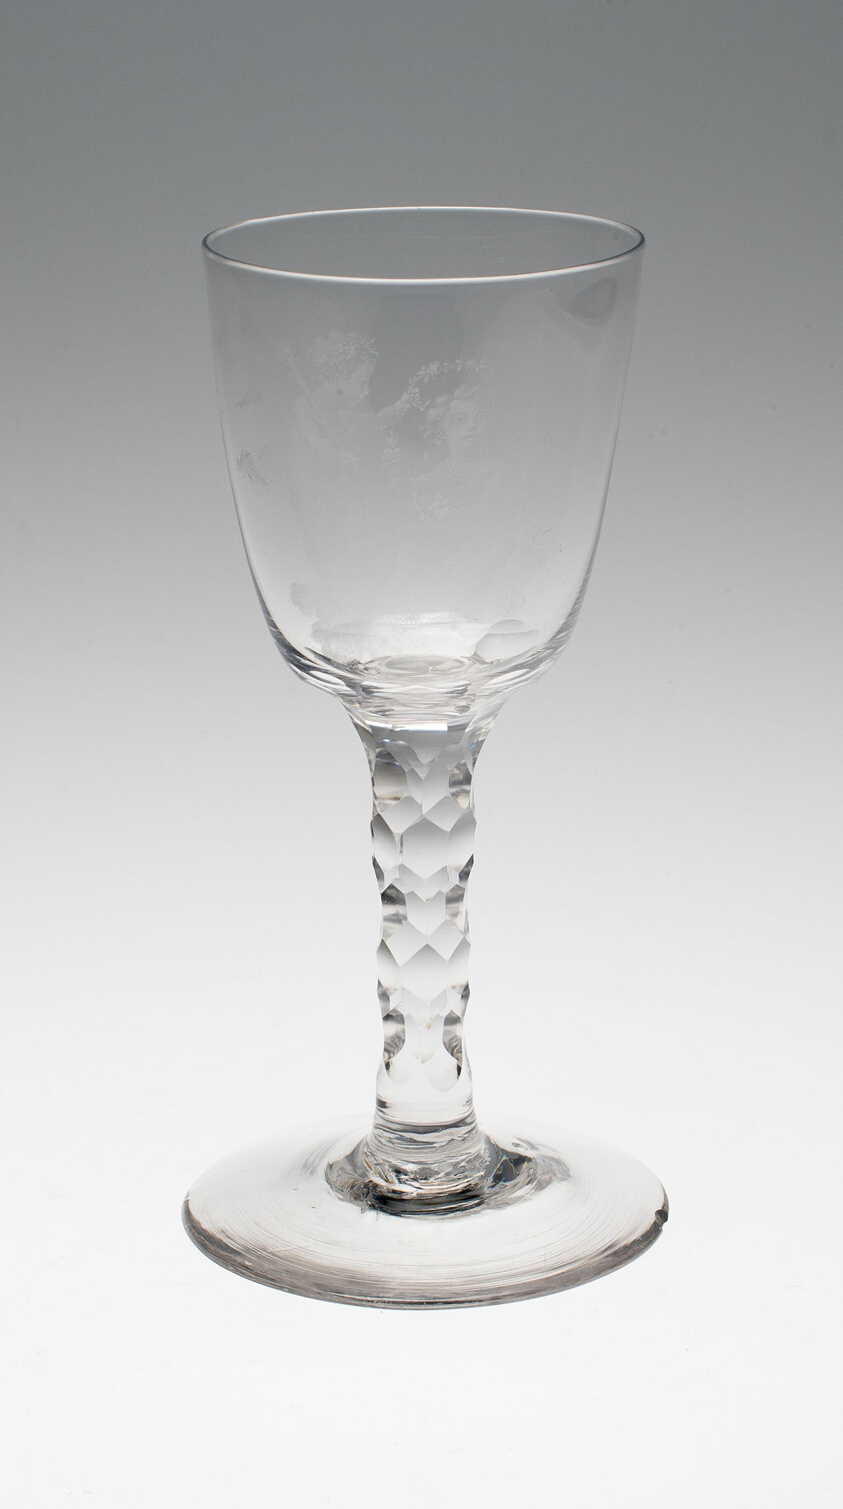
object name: Glass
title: Wine Glass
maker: England or Netherlands; Engraved: Northern Netherlands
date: c. 1795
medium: Glass; cut and stipple engraved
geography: England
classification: drinking vessel; glass; european decorative arts